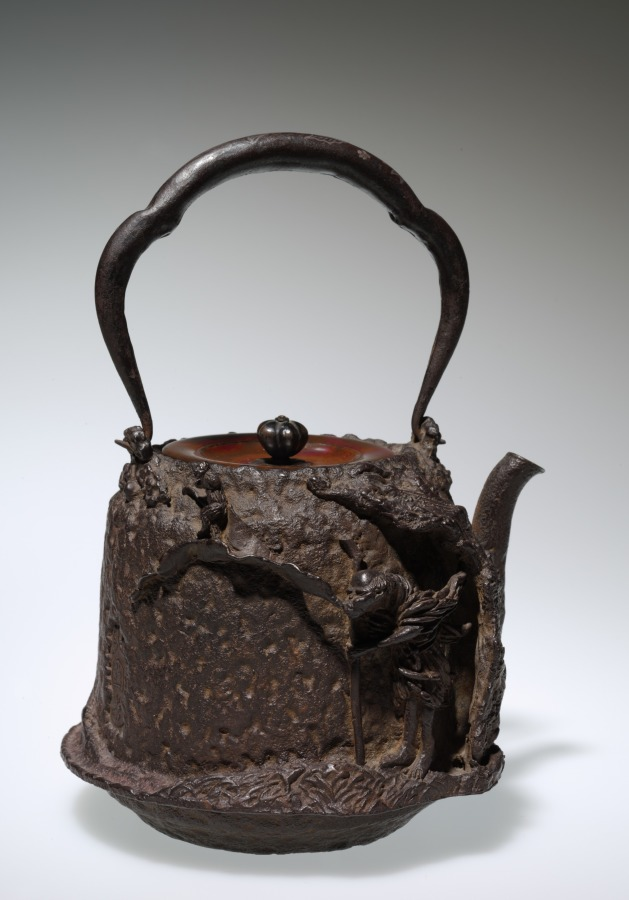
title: Covered Tea Kettle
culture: Japan, Edo period (1615–1868)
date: 1615–1868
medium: iron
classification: Metalwork